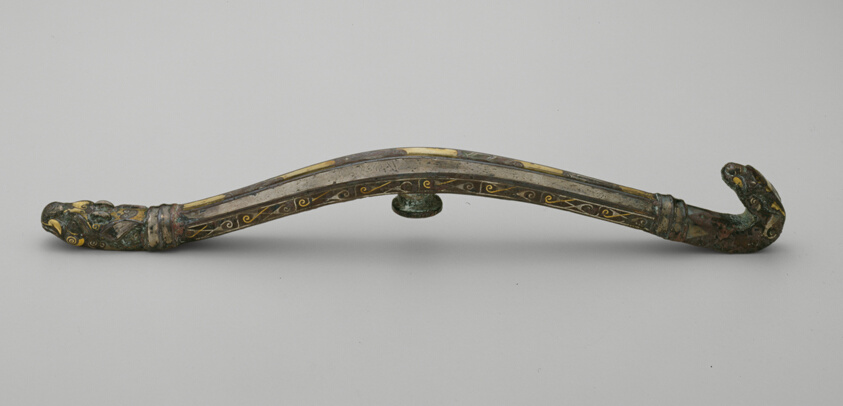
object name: Decorative Arts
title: Garment Hook (Daigou)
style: Chinese (culture or style)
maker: China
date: Eastern Zhou dynasty, Warring States period (480–221 B.C.), late 4th/3rd century B.C.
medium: Bronze inlaid with gold and silver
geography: China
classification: bronze; metal; decorative object/ornament; asian art; decorative arts